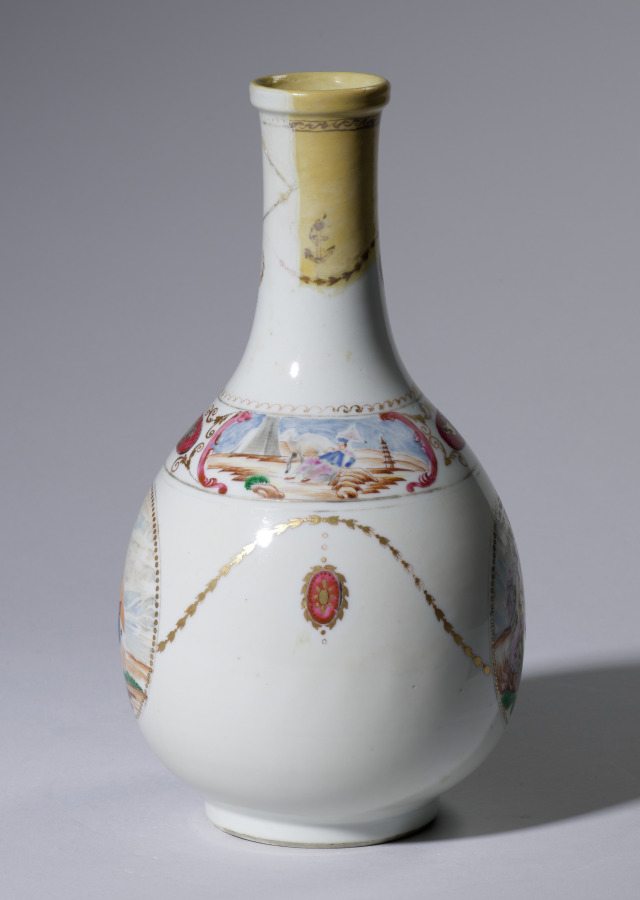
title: Bottle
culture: China, Chinese Export, early 19th century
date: c. 1800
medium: porcelain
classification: Ceramic